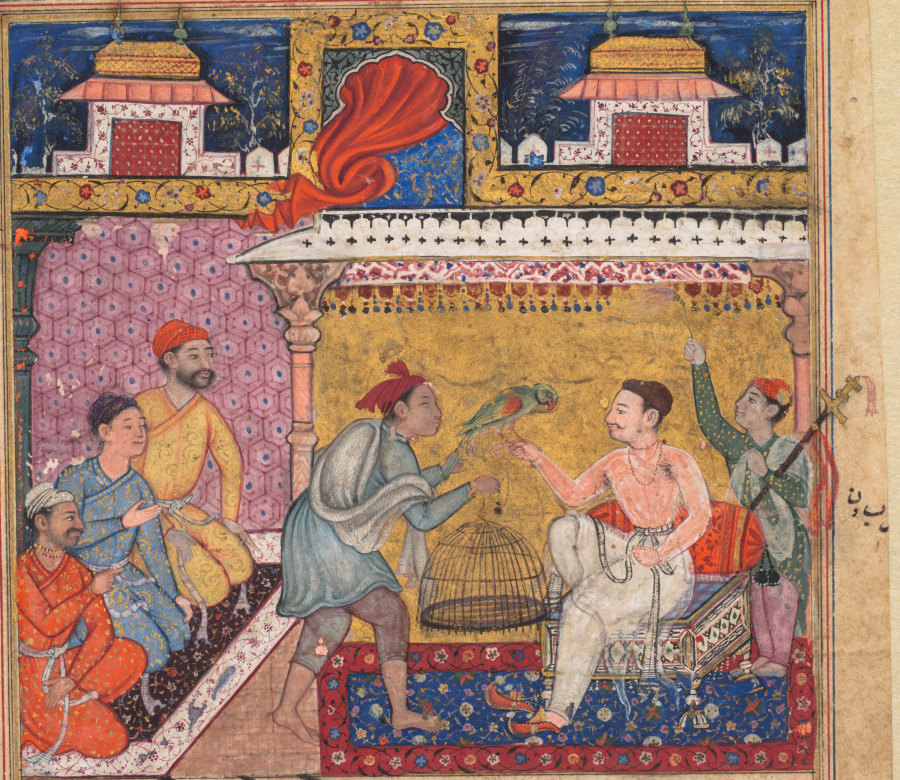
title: The hunter offers the mother parrot to the king of Kamarupa, from a Tuti-nama (Tales of a Parrot): Fifth Night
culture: Mughal India, court of Akbar (reigned 1556–1605)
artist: Basavana (Indian, active c. 1560–1600)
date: c. 1560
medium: gum tempera, ink, and gold on paper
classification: Painting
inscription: 'amal basāwan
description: The king of Kamarupa, which ironically means “body of erotic love,” had leprosy. The hunter brought the captured mother parrot to the king, assuring him that the bird knew a cure. The lavish use of gold indicates that this book was a costly production. The figure of the hunter reveals the talents of the artist Basavana, whose name is written in the right margin. Draped in rustic garments shaded to appear softly flowing, the hunter bends forward with a subtle look of shrewd expectancy as the king seems ready to pay a high price for the parrot. The billowing red curtain is one of Basavana’s signature motifs. Beyond is a tantalizing glimpse of the forest to which the parrot will soon escape to rejoin her children.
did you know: This leper king ruled a territory that stretched from Bhutan to Assam and Bengal.